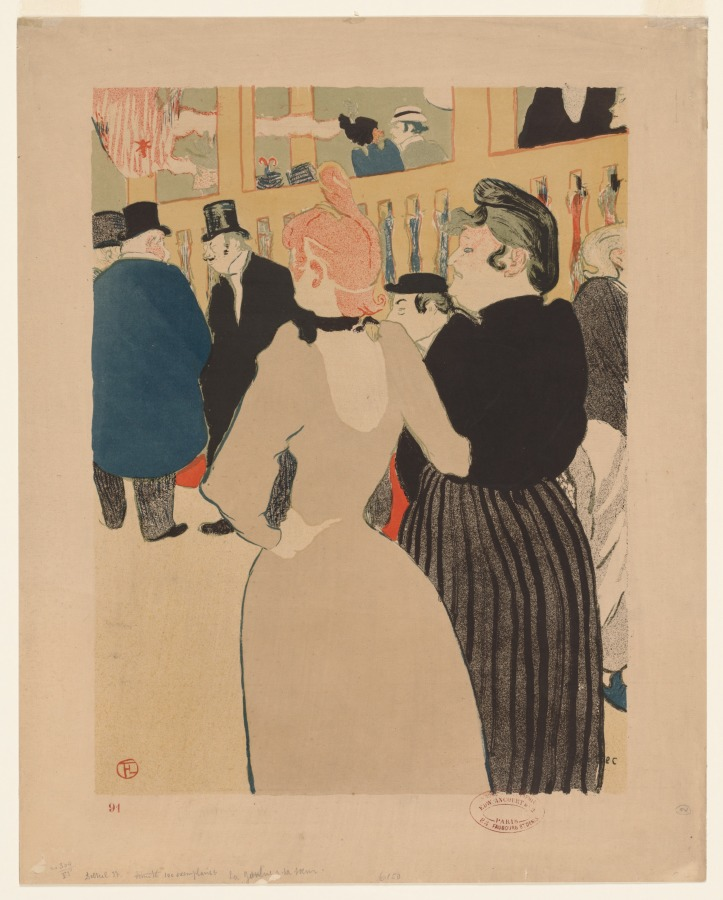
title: At the Moulin Rouge: La Goulue and Her Sister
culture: France, 19th century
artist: Henri de Toulouse-Lautrec (French, 1864–1901)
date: 1892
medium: color lithograph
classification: Print